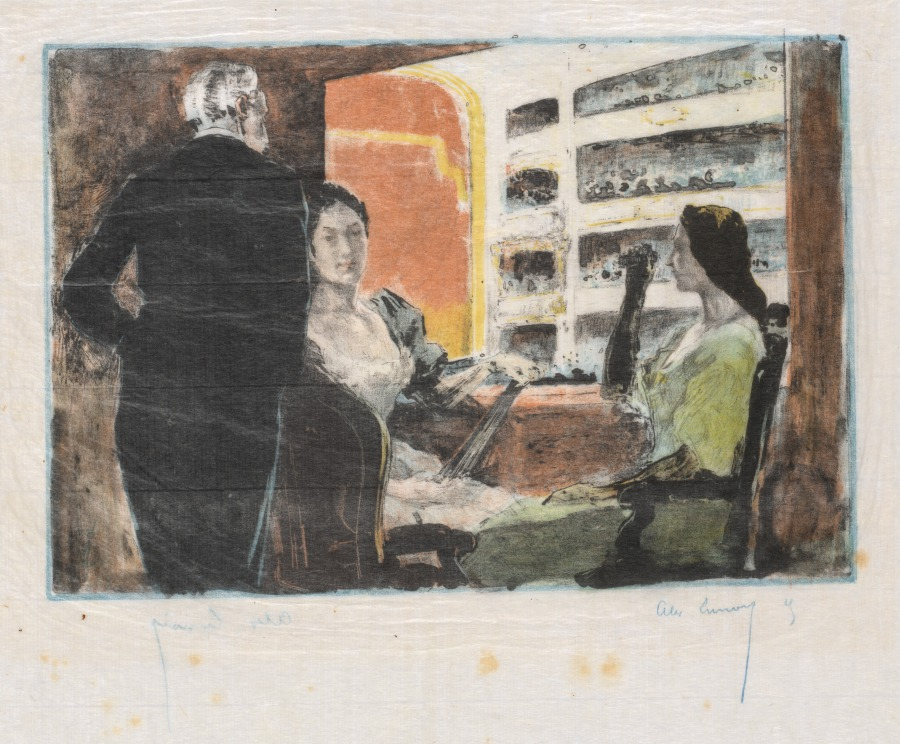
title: The Opera Box (La Loge de L'Opera)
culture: France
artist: Alexandre Lunois (French, 1863–1916)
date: 1894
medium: tissue paper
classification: Print